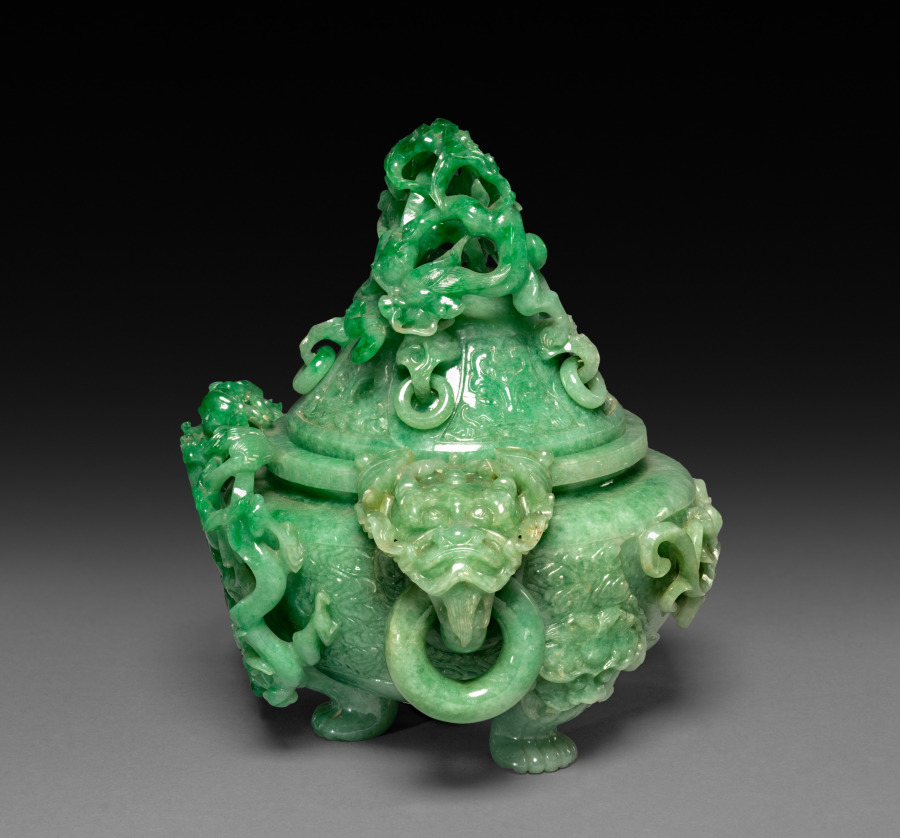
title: Three-Sectional Altar Group: Koro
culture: China, Qing dynasty (1644-1911)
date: 1644–1911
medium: jade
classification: Jade